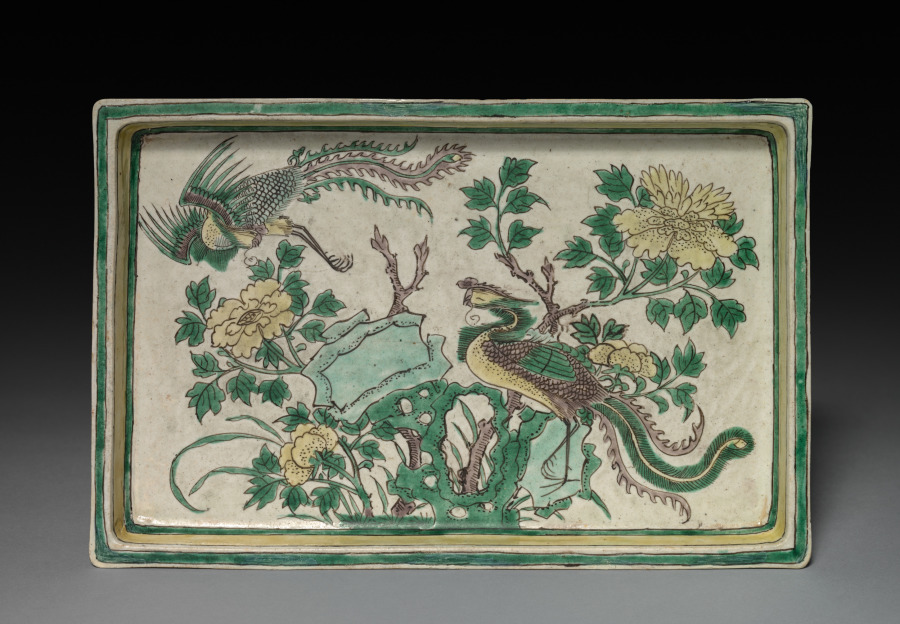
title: Tray with Phoenixes in Landscape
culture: China, Jiangxi province, Jingdezhen kilns, Qing dynasty (1644-1911), Kangxi reign (1662-1722)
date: 1662–1722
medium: porcelain with incised and sancai (3-color) enamel decoration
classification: Ceramic